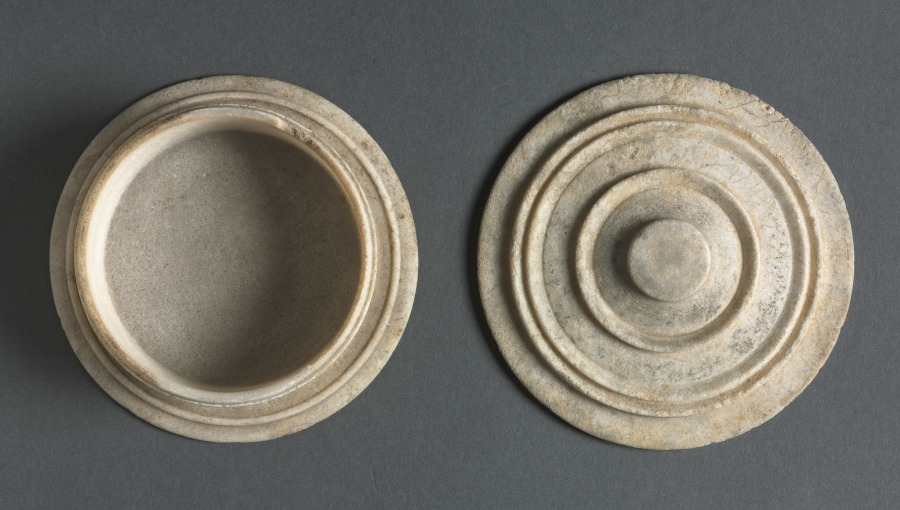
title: Pyxis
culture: Greece, Attic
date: 400–300 BCE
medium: marble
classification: Stone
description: Pyxides came in a huge variety of sizes, shapes, and materials in the ancient world. Images of pyxides in Greek art often show them being used by women, which has led scholars to believe that they may have been used to hold jewelry or cosmetics. This pyxis is one of few surviving examples made from stone, signifying that it may have had an elite owner.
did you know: This vessel has a threaded lid, like a modern mason jar, allowing it to be tightly sealed.